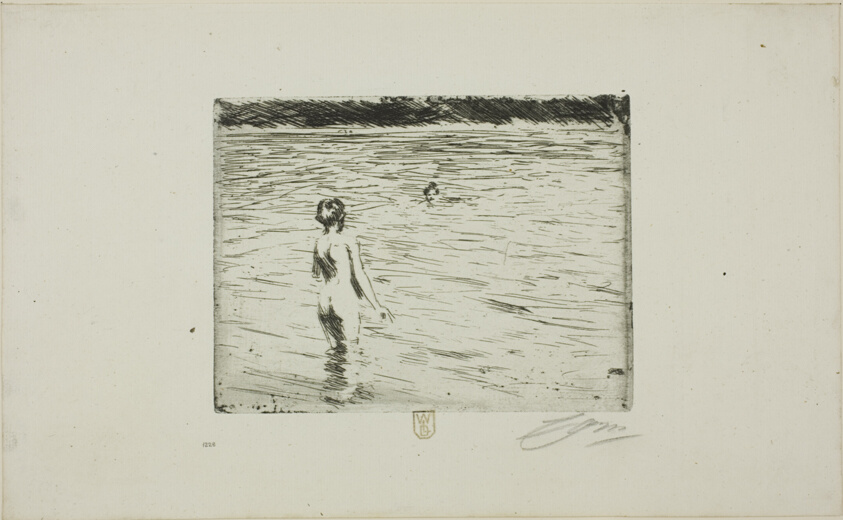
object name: Print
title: Mother Bathing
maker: Anders Zorn (Swedish, 1860-1920)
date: 1894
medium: Etching on ivory laid paper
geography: Sweden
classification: etching; print; prints and drawing